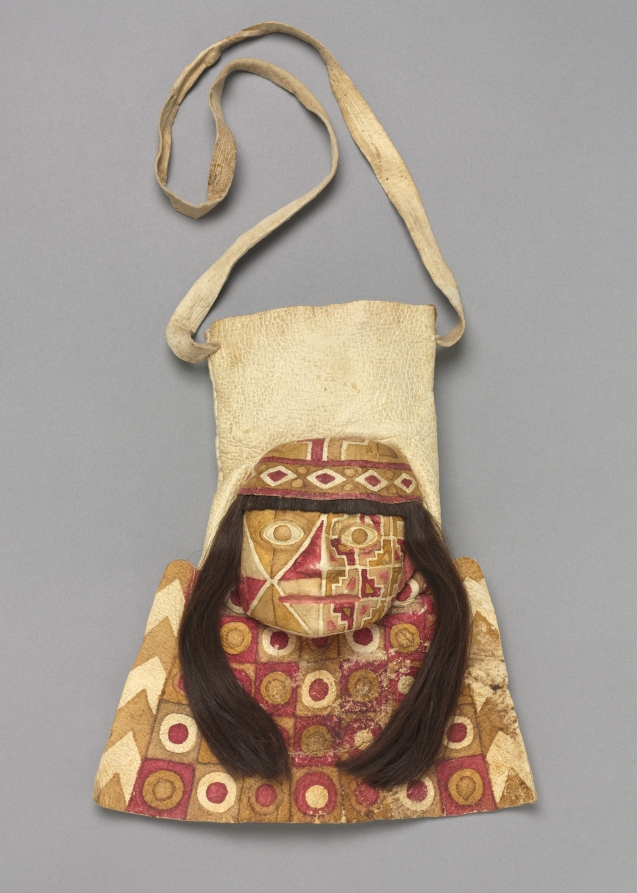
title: Bag with Human Face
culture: Andes, Wari, Middle Horizon, 6th-10th century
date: 600–1000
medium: alpaca or llama hide, human hair, pigment, cotton; coca leaf contents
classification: Mixed Media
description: The face on this bag is decorated with geometric designs that also appear on Wari warrior representations; the circles on the panel beneath the face may refer to an elite tunic made of tie-dyed cloth. The bag was used to carry coca leaves, which in the past and today have important practical and religious purposes in the Andes. Chewing the leaves during physical exertion improves stamina; when used ritually, the leaves initiate communion with cosmic forces.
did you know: This bag was used to carry coca leaves.